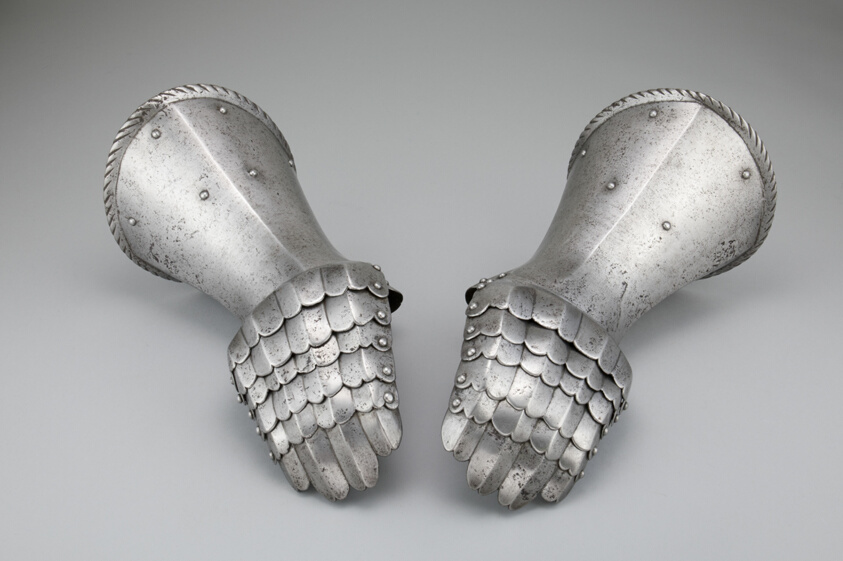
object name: Armor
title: Pair of Mitten Gauntlets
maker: Spanish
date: c. 1500/20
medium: Steel and leather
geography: Spain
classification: suit-gauntlet; armor; arms and armor